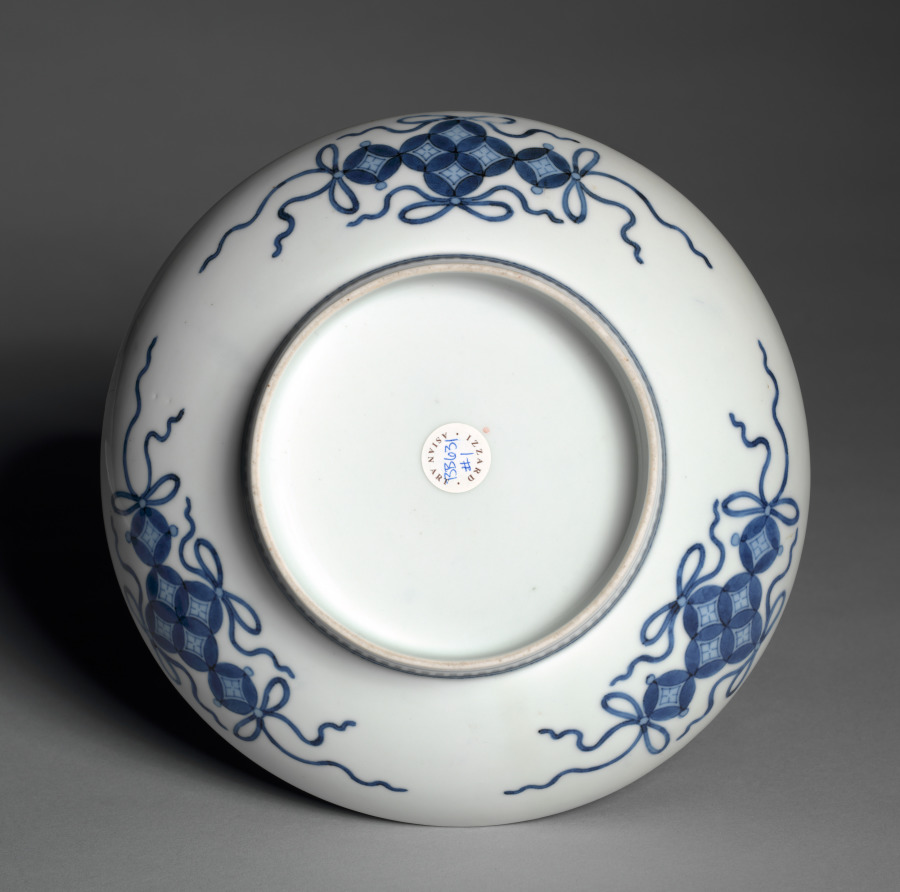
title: Dish with Sweet Osmanthus and Cloud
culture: Japan, Edo period (1615–1868)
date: late 1600s–early 1700s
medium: Porcelain with underglaze blue and overglaze color enamel (Hizen ware, Nabeshima type)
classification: Ceramic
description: The dish is an example of the finest type of early Japanese porcelain, Nabeshima-type Hizen ware. It is decorated with sweet osmanthus, or fragrant olive tree, with iron-red flowers and green and yellow enamels on the leaves. A band of misty clouds in underglaze blue completes the composition. The osmanthus tree was imported from China to southern Japan.